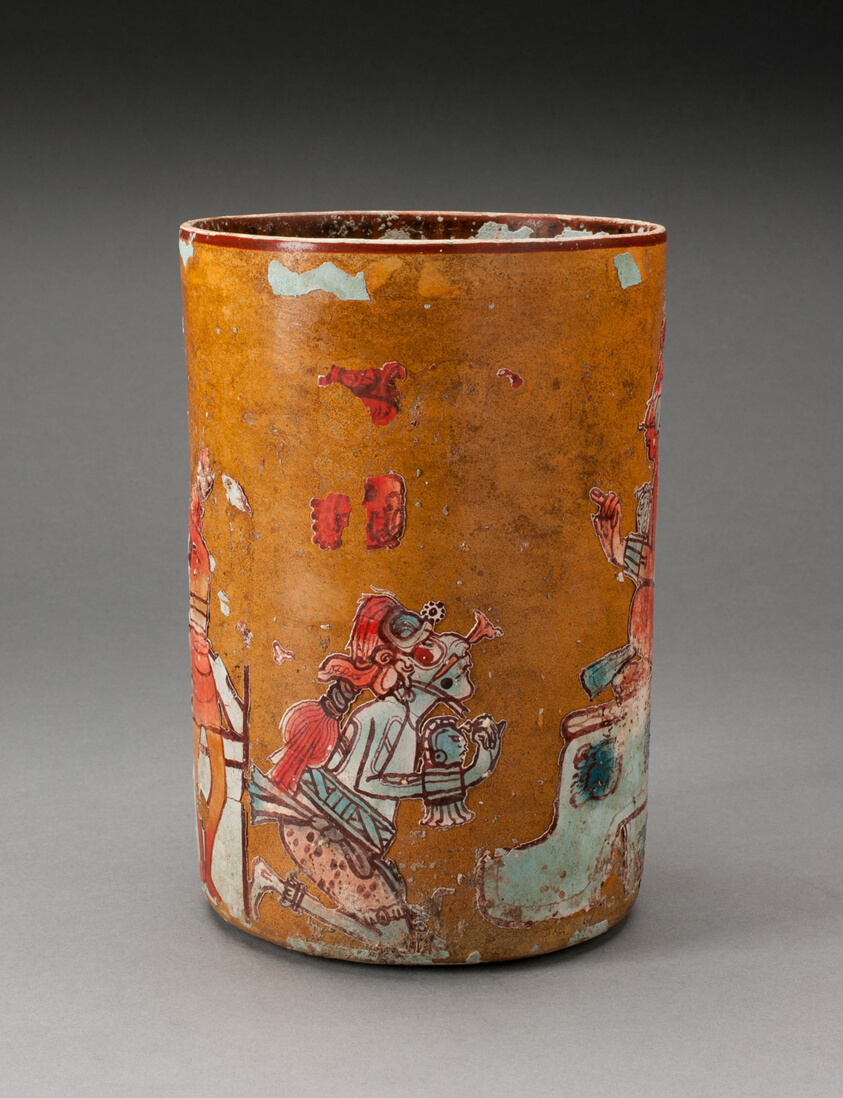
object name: Vessel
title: Vase Depicting a Courtly Scene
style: maya, mayan, americas, Arts of the Americas, mesoamerican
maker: Late Classic Maya; Petén region, Guatemala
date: 600–800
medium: Earthenware, slip, stucco, and pigment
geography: Guatemala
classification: earthenware; art of the americas; ceramics; vessel